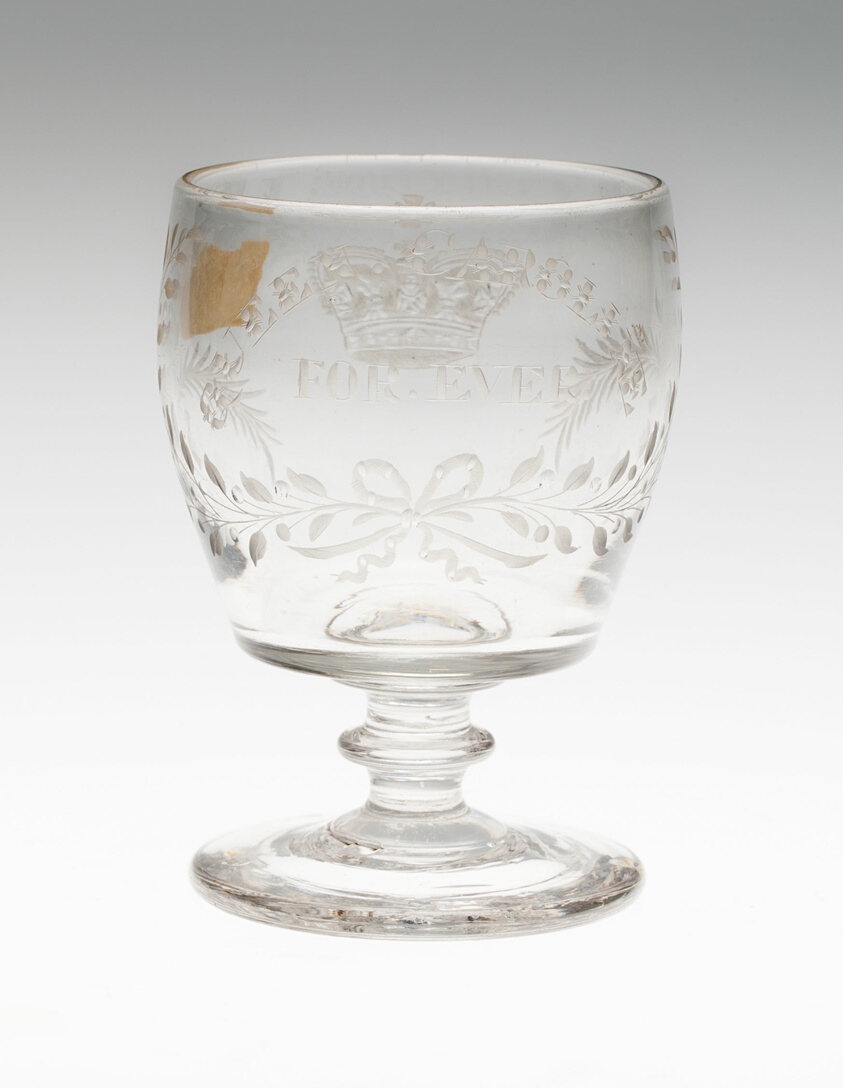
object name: Glass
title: Goblet Commemorating Queen Caroline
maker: England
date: c. 1820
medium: Glass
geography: England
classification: drinking vessel; glass; european decorative arts